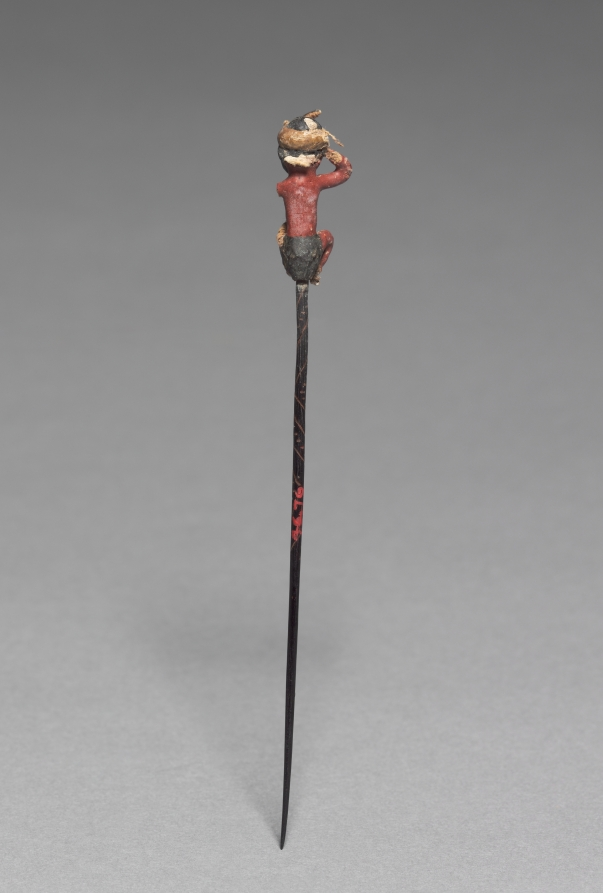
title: Pin with Yarn Figure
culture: Peru, South Coast, Nasca style?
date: c. 300 BCE–200 CE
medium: wood, yarn, paint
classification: Jewelry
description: Paracas headgear from mummy bundles sometimes incorporate human-hair wigs, wound with long headbands and slings. Ornamented with a diminutive kneeling figure, this pin may have been used like a hat pin to hold the wrappings in place. Although poorly preserved, this object illustrates the use of resin pigment on materials other than ceramics.